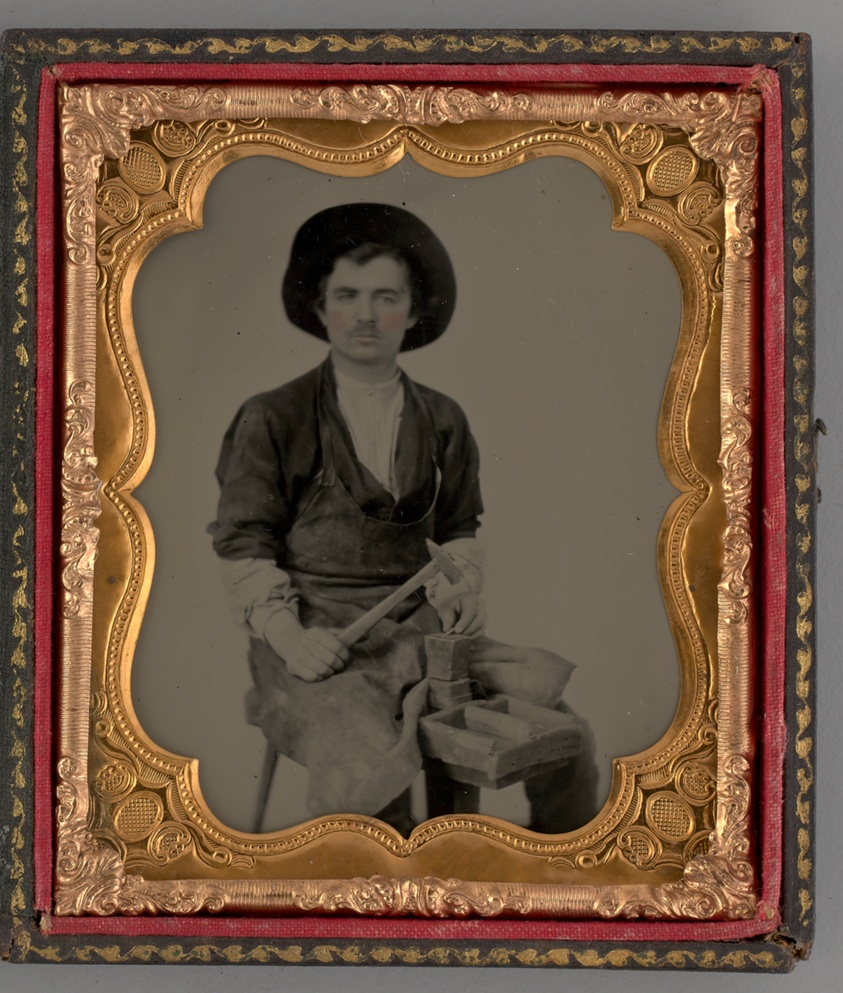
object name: Photograph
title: Untitled (Portrait of Seated Man with Hat)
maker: Unknown maker; American, 19th century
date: 1860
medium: Ambrotype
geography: United States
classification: portrait; ambrotype; portrait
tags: lundberg collection, portraits, portraits: male subject